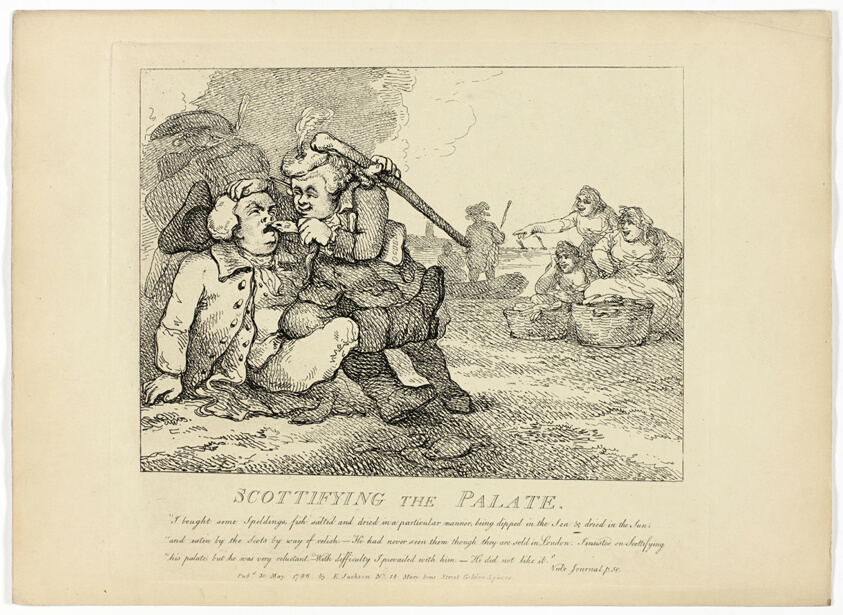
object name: Print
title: Scottifiying the Palate, from Boswell's Tour of the Hebrides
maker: Thomas Rowlandson (English, 1756-1827)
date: 1786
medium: Etching on paper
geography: England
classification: etching; print; prints and drawing